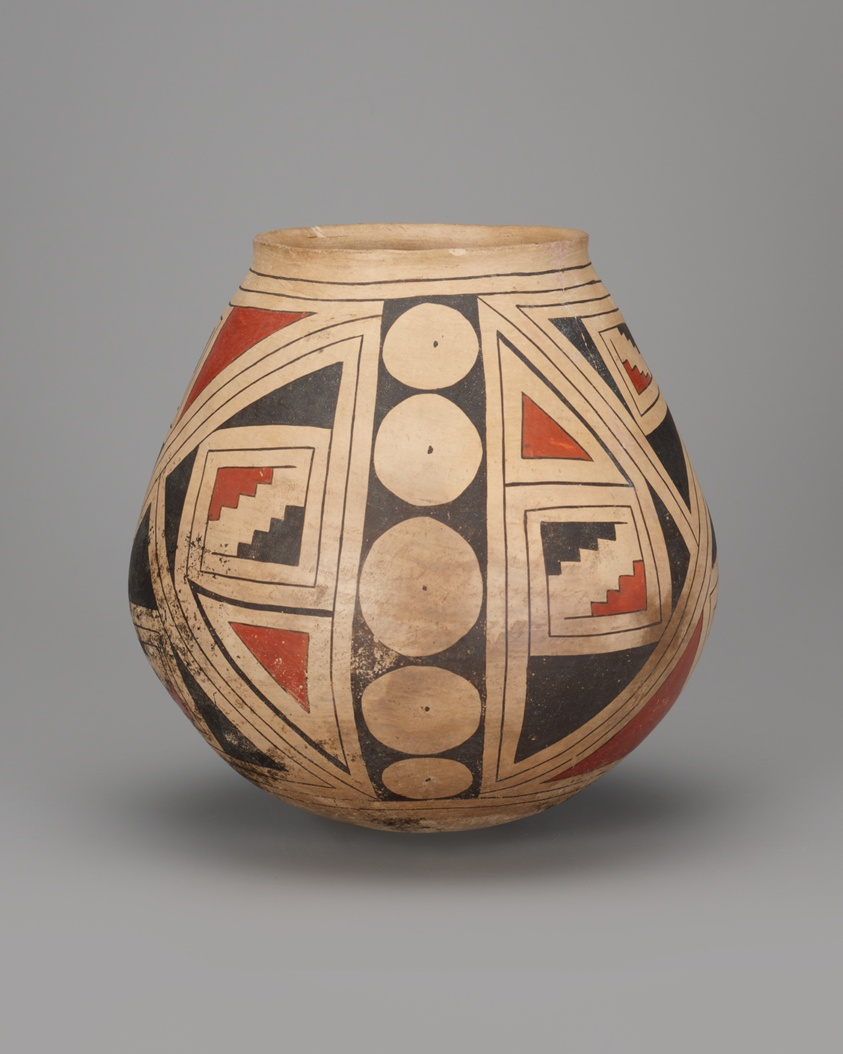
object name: Vessel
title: Ramos Polychrome vessel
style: casas grandes, americas, Arts of the Americas, native american, native north american, southwest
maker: Ceramist unknown (Casas Grandes); New Mexico, United States, or Chihuahua, Mexico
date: 1280–1450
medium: Ceramic and pigment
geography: New Mexico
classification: vessel; art of the americas; ceramics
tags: abstraction